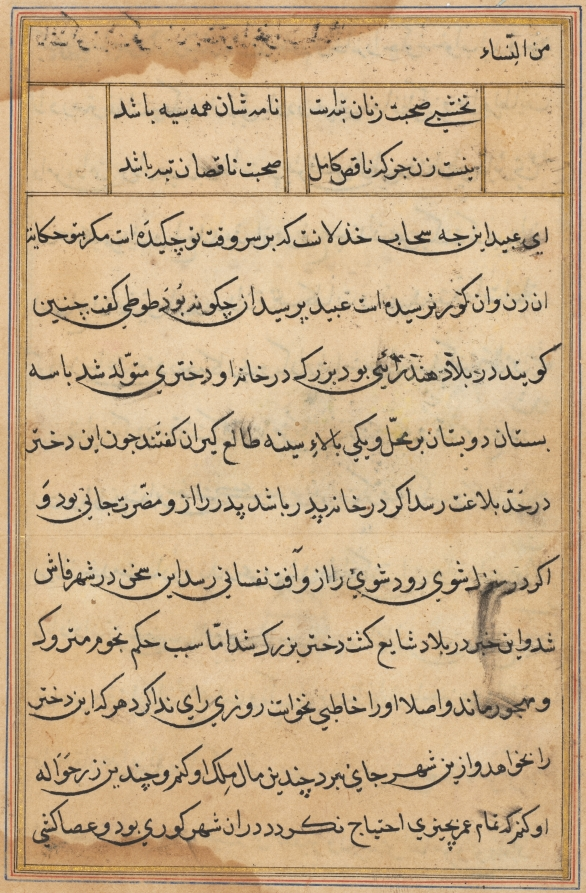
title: Page from Tales of a Parrot (Tuti-nama): text page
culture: Mughal India, court of Akbar (reigned 1556–1605)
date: c. 1560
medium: gum tempera, ink, and gold on paper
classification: Painting